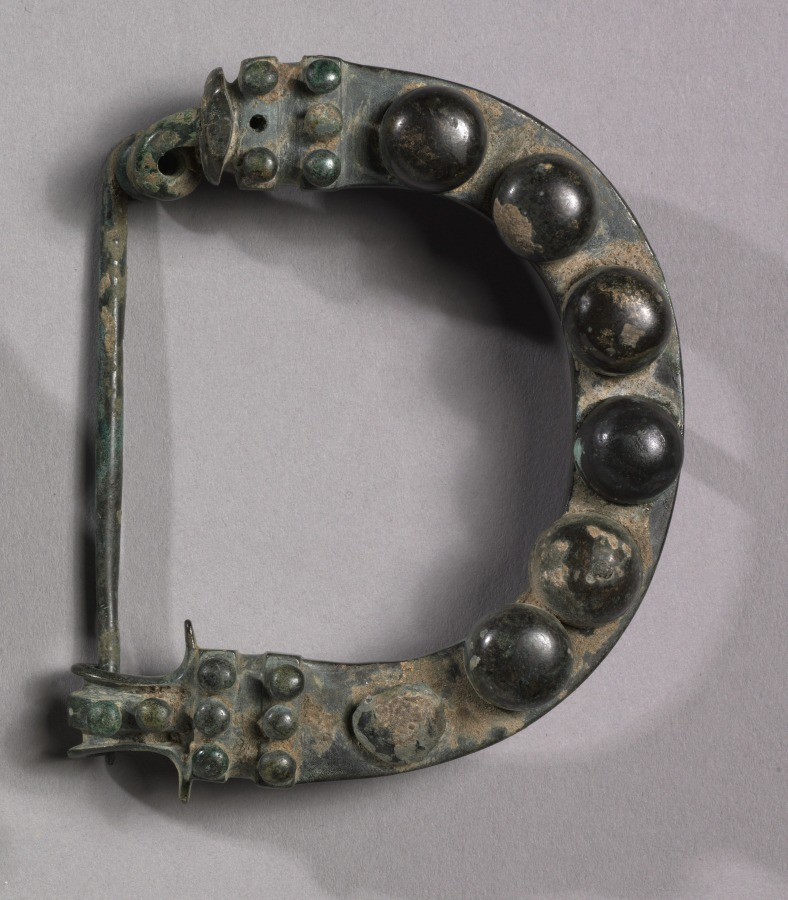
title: Arched Fibulae (1 of 2)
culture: Anatolia, Phrygia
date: 725–675 BCE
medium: bronze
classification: Metalwork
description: Dated to the time of King Midas, these fibulae may have been a matched pair. The type was popular and has been found throughout Anatolia and in Greece. In the 5th century BC the Greek historian Herodotus wrote that the Phrygian king Midas reigned in the late 8th century BC, and dedicated a throne to the oracle at Delphi. This is the earliest historical reference to the Phrygians, a name given them by the ancient Greeks. The passage in Herodotus, taken together with archaeological finds in the Ionian Greek city states and on the Greek mainland, shows that Phrygians and Greeks enjoyed close relations in the late 8th to early 7th century BC.